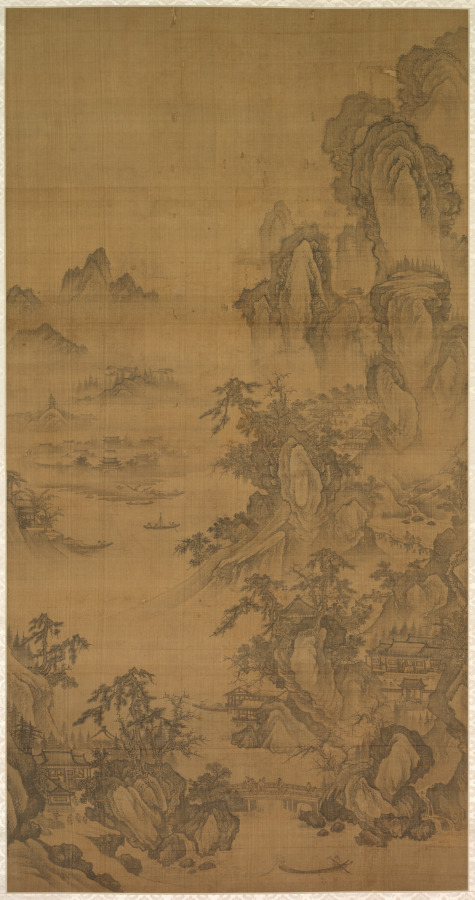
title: Mountain Market, Clear with Rising Mist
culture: Korea, Joseon dynasty (1392–1910)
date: early 1500s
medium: Hanging scroll; ink on silk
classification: Painting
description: This painting depicts several vignettes of the scholar-hermit’s various activities. In the lower left corner, the scholar-hermit is portrayed welcoming his guest in the courtyard. In the middle section on the lower bottom, the scholar and his guest are shown encountering another traveler on the bridge and exchanging their greetings. After crossing the bridge, the scholar visits a friend who lives in a compound of multiple buildings. The two friends decide to take a short walk. Both appear in a terraced cliff, enjoying a mountain vista and the fragrance of an old pine tree carried by the gentle wind. The scholar continues his journey with his two servants. They are portrayed crossing a winding wooden bridge. Right beyond the colossal rocky mountain, a panoramic view to a bustling market place unfolds, suggesting that it may be the place where the scholar-hermit’s entourage would visit. Perhaps the scholar need to buy items such as books, rolls of papers, and brushes, all essential to scholarly life. Toward the upper left corner, another group of travelers is landing on the river bank that leads to the city gate; they may be headed to the multistoried Buddhist stupa nestled on the top of the mountains.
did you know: Due to its stylistic features, this painting has long been believed to be a Chinese painting of the Northern Song period, dated to the 12th century.